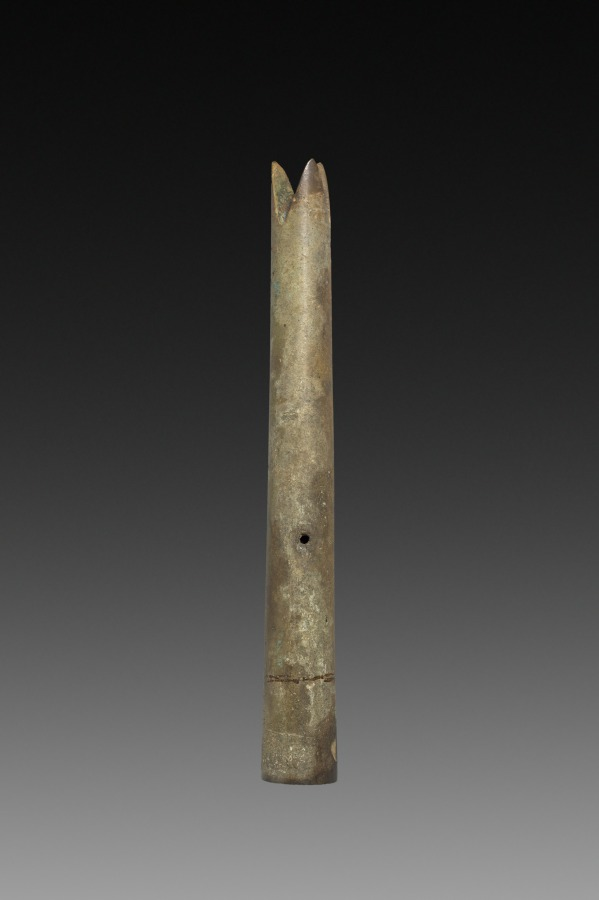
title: Spear with Three Points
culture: China, Zhou dynasty (c. 1046–256 BCE)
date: 1045–256 BCE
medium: bronze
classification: Arms and Armor